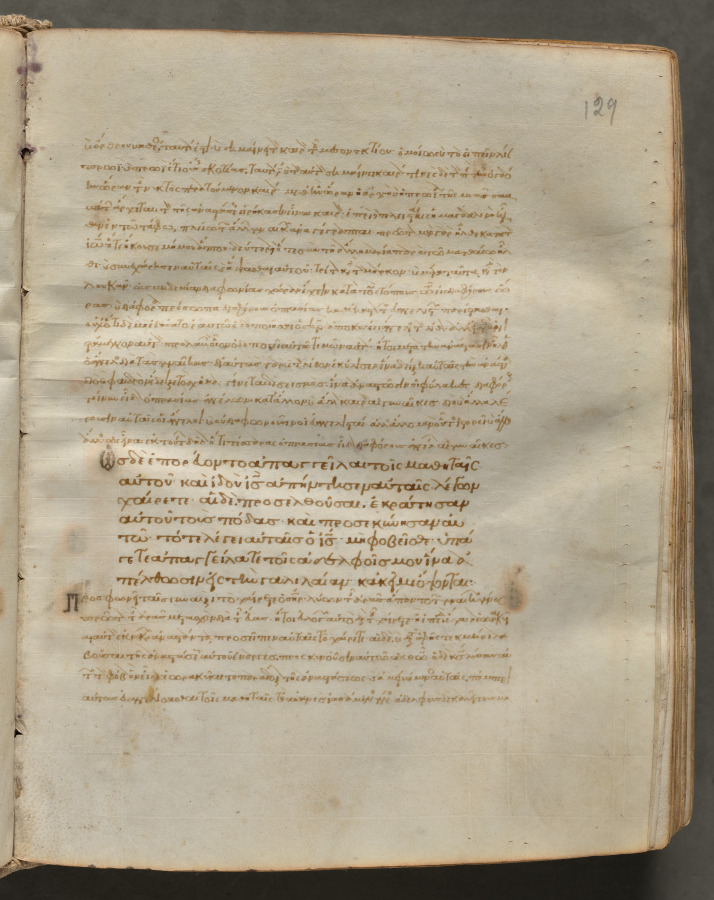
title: Text, folio 129 (recto), from a Gospel Book with Commentaries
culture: Byzantium, Constantinople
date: c. 1000–1100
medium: ink, tempera, and gold on vellum; leather binding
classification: Bound Volume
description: Each of the four gospels in this book opens on a page with brilliantly illuminated borders depicting the author of the text as well as birds-principally peacocks, symbols of the immortality of the soul-and fountains, representing the fountain of life and the salvation of the soul. This volume consists of 428 leaves with texts in Greek. Its level of sophistication suggests that it was probably written and decorated in a monastery in Constantinople.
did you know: Gospel Books were carried in procession through Byzantine churches.